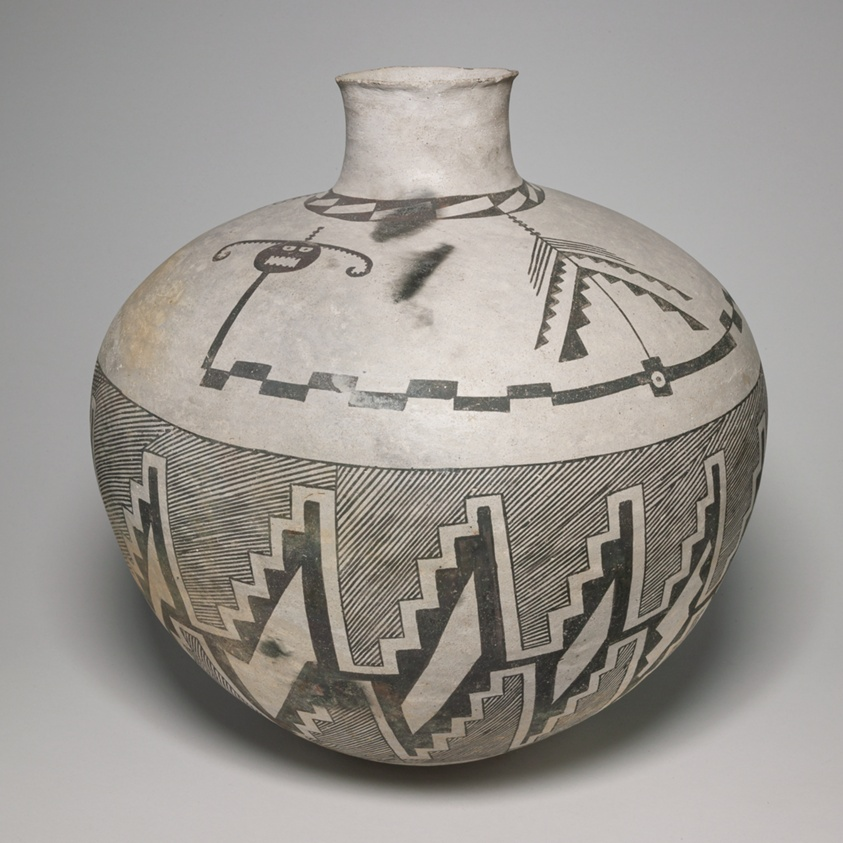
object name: Vessel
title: Jar with Horned Serpents and Interlocking, Hatched-and-Black Stepped Designs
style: ancestral pueblo (anasazi), anasazi, southwest, pueblo, americas, native american, native north american, Arts of the Americas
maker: Ancestral Pueblo (Anasazi), Socorro Black-on-white; West-central New Mexico, United States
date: 950–1400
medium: Ceramic and pigment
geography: New Mexico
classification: vessel; ceramics; art of the americas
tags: serpents, checkerboards, geometric, hatching, feathers, mythological figures